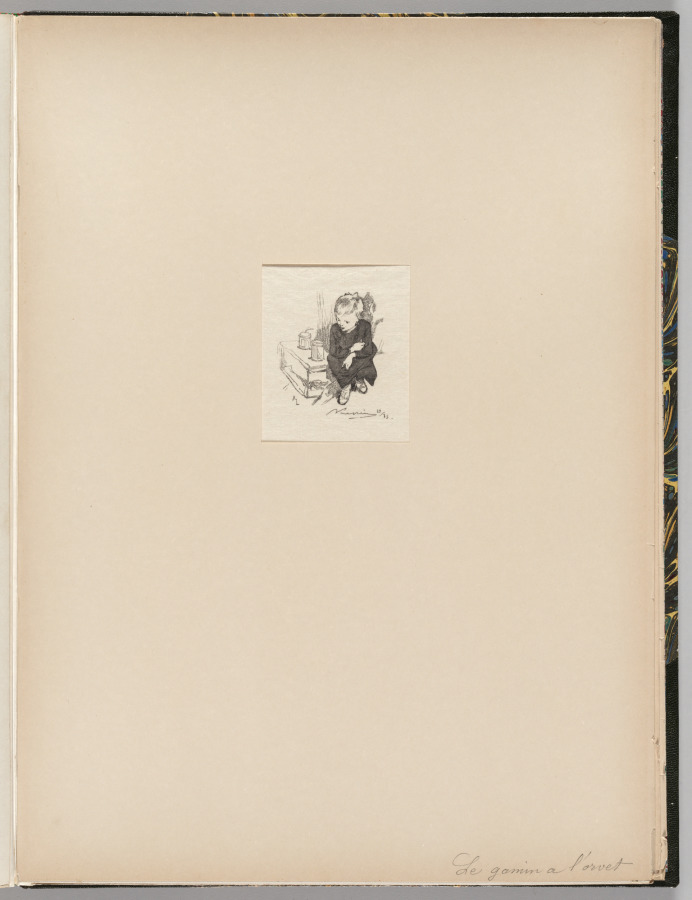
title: Fontainebleau Forest: Le gamin a l'orvet (La Forêt de Fontainebleau: Le gamin à l'orvet)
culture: France, 19th century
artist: Auguste Louis Lepère (French, 1849–1918)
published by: A. Desmoulins, Published in Revue Illustrée, 1887–90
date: 1890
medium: wood engraving from bound volume of 34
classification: Bound Volume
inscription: In block, lower left: AL; below image, lower right, in black ink: ALepère 22/35; on window mat, lower right, in graphite: Le gamin à l'orvet